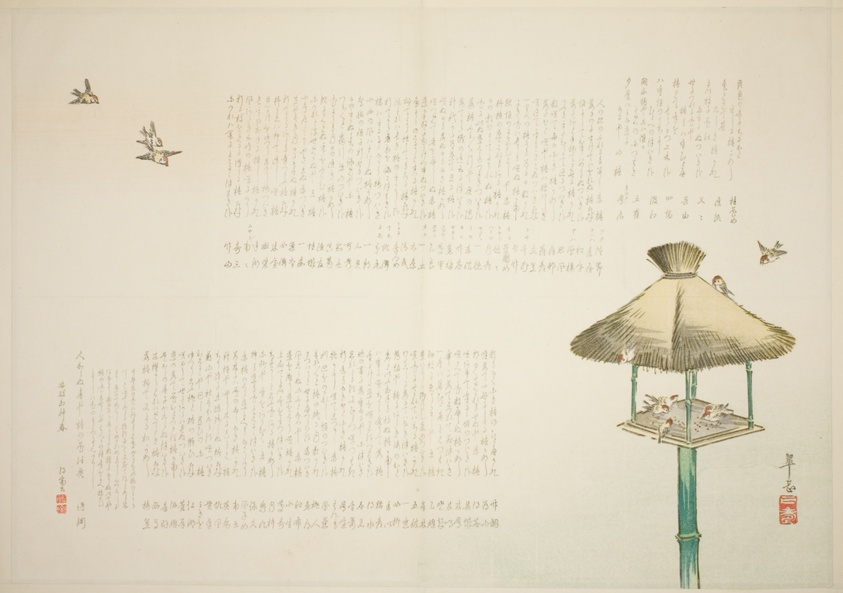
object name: Print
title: Unknown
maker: Seki Suigaku (Japanese, active 19th century)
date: 1855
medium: Color woodblock print; surimono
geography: Japan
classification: print; asian art